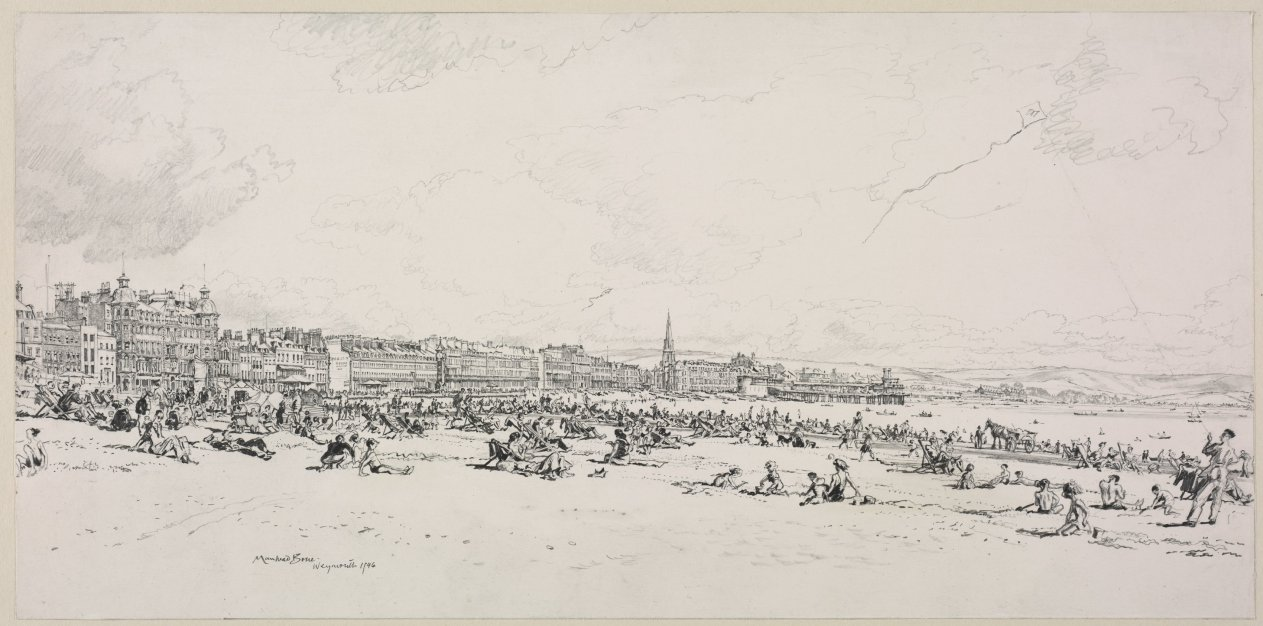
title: Weymouth Bay, The High Season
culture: England, 20th century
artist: Muirhead Bone (British, 1876–1953)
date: 1946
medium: graphite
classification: Drawing